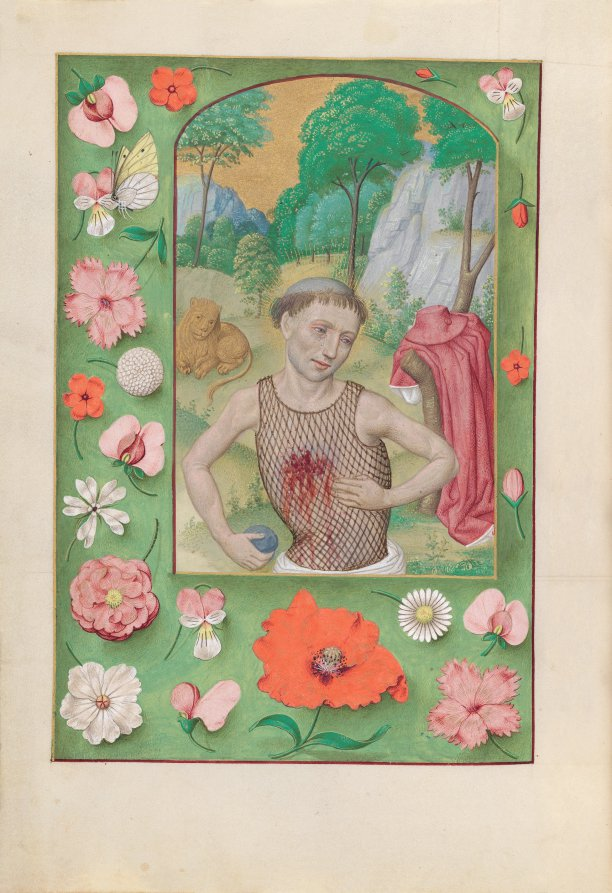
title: Hours of Queen Isabella the Catholic, Queen of Spain: Fol. 185v, St. Jerome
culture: Flanders, Ghent and Bruges, late 15th century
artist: Master of the First Prayerbook of Maximillian (Flemish, c. 1444–1519)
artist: and Associates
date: c. 1500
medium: ink, tempera, and gold on vellum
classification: Bound Volume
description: This manuscript was illuminated by a circle of at least five highly organized manuscript painters active in the Flemish cities of Ghent and Bruges. The principal illuminator was Alexander Bening, who painted the majority of the book's miniatures. Manuscripts produced by this circle of artists are renowned for the decoration of their borders, which typically feature a rich variety of realistically-painted flowers, birds, and butterflies. This prayer book, called a book of hours, was intended not for a cleric, but for the private devotions of a lay person-in this case, Isabella the Catholic, Queen of Spain (1451-1504). Isabella's coat of arms embellishes the book's frontispiece. It is unlikely that the book was commissioned by the Queen herself; rather, she probably received it as a diplomatic gift from someone courting her patronage, perhaps Cardinal Francisco Jimenez de Cisneros. A Franciscan friar, Jimenez was dependent upon Isabella for his advancement, first to the post of Queen's confessor in 1492, and then to Archbishop of Toledo in 1495.